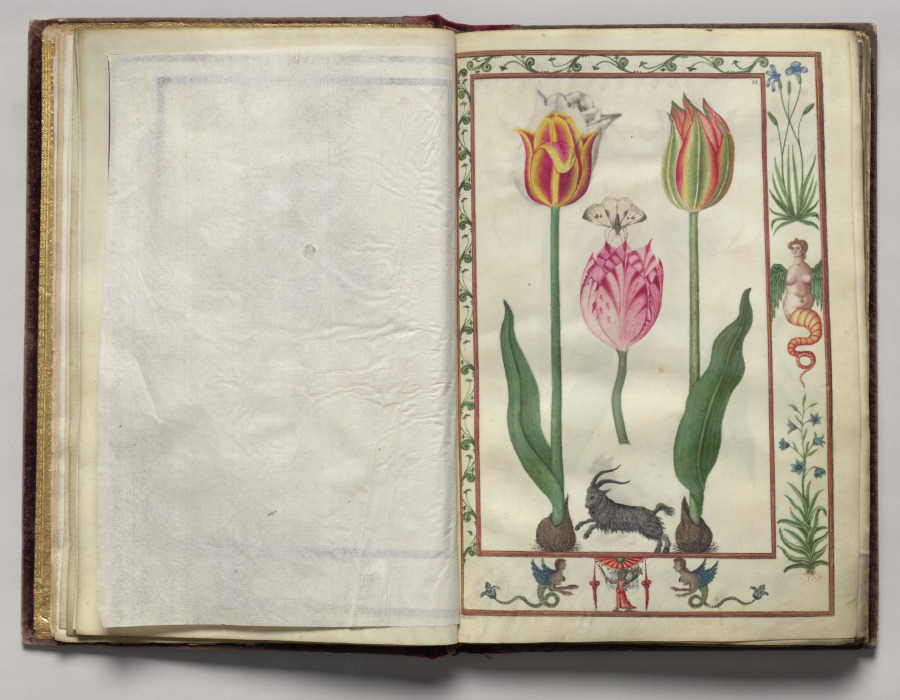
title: Tulips, Moth, and Goat with Hybrid Creature Border, folio 7 (recto), from Florilegium (A Book of Flower Studies)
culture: France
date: 1608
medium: watercolor, ink, silver, and gold over occasional traces of pencil, on vellum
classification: Bound Volume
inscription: Dated: Poitiers 1608 (on frontispiece) Signed: On frontispiece in black ink, lower right: Van Kuyk Notation on drawing: Frontispiece: in pencil, lower margin: * élève de Van Kessel, peintre flammand (* in pencil also appears in front of Van Kuyk's name).